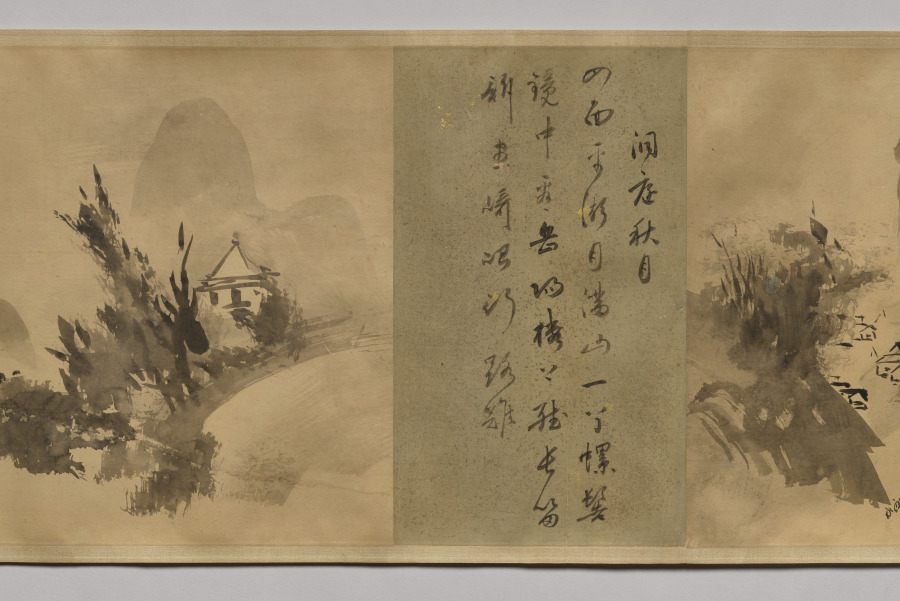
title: Poems and Pictures of the Eight Views of Xiao-Xiang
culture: Japan, Momoyama period (1573–1615)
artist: Unkoku Tōgan (Japanese, 1547–1618)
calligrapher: Inkei Gentetsu (Japanese, 1562–1612)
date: 1605–12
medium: Handscroll; ink on paper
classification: Painting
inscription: Each painting sealed with red gourd-shaped seal reading Unkoku (雲谷) and a square seal reading Tōgan (等顔).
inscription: Each painting prefaced with a titled poem on the Eight Views of Xiao-Xiang by Yujian Ruofen (active late 13th century) inscribed by Japanese Buddhist monk Inkei Gentetsu (1562–1612).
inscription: 右寫玉㵎之筆勢／雪舟末葉等顔筆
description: Unkoku Tōgan brushed these scenes using the splashed-ink technique associated in Japan with the Chinese monk Yujian Ruofen (active late 1200s). Xiao-Xiang refers to the region in present-day Hunan province, where the Xiang River and its tributaries converge. Each of the eight views evokes a time of day or season. The earliest surviving series of Xiao-Xiang paintings is by Wang Hong (active mid-1100s), but textual evidence tells us the theme appears earlier. It was later adopted in Japan and Korea, as seen here. The poems were inscribed by Inkei Gentetsu, the third abbot of the Rinzai Zen temple Tōshunji, Japan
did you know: The “Tō” of Tōgan comes from the name of painter Sesshū Tōyō (1420–1506).